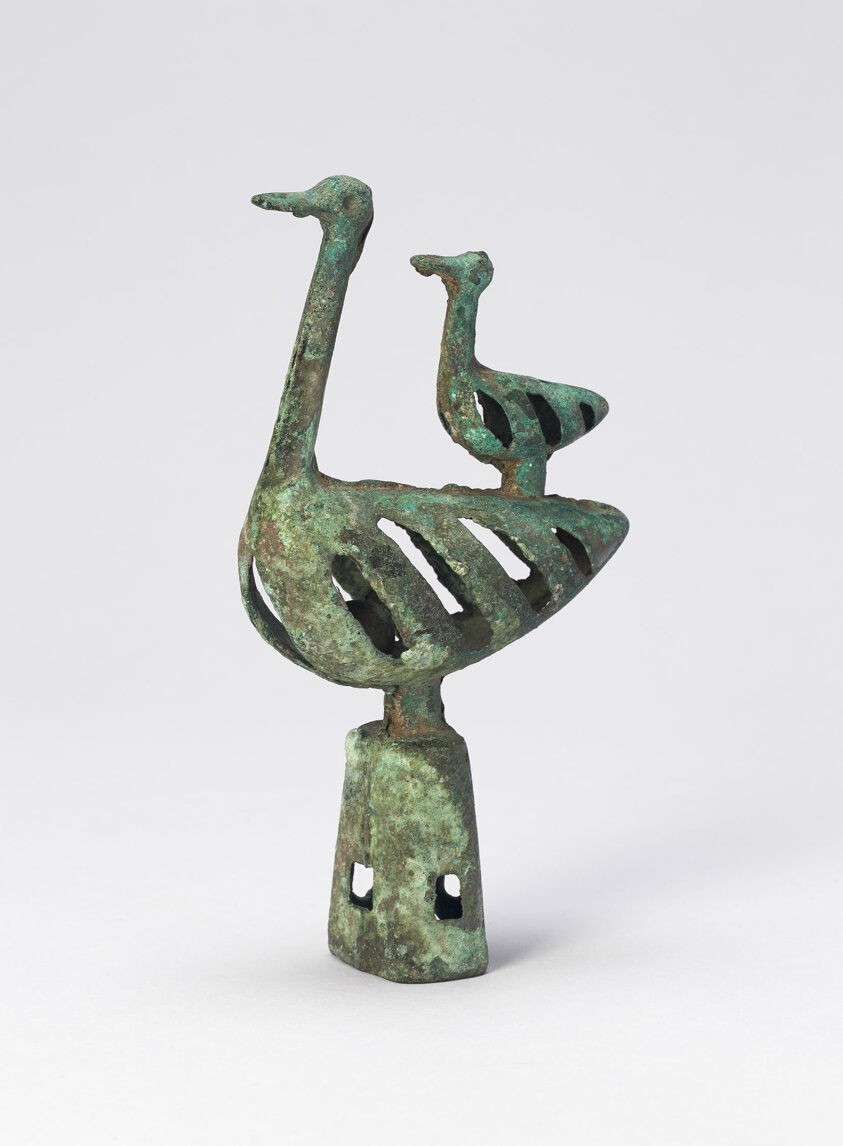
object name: Sculpture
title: Pole Top with Double Bird-Shaped Bell (one of pair)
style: Chinese (culture or style)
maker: Northern China or Inner Mongolia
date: 6th/4th century B.C.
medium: Bronze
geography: China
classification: bronze; metal; decorative object/ornament; asian art; sculpture